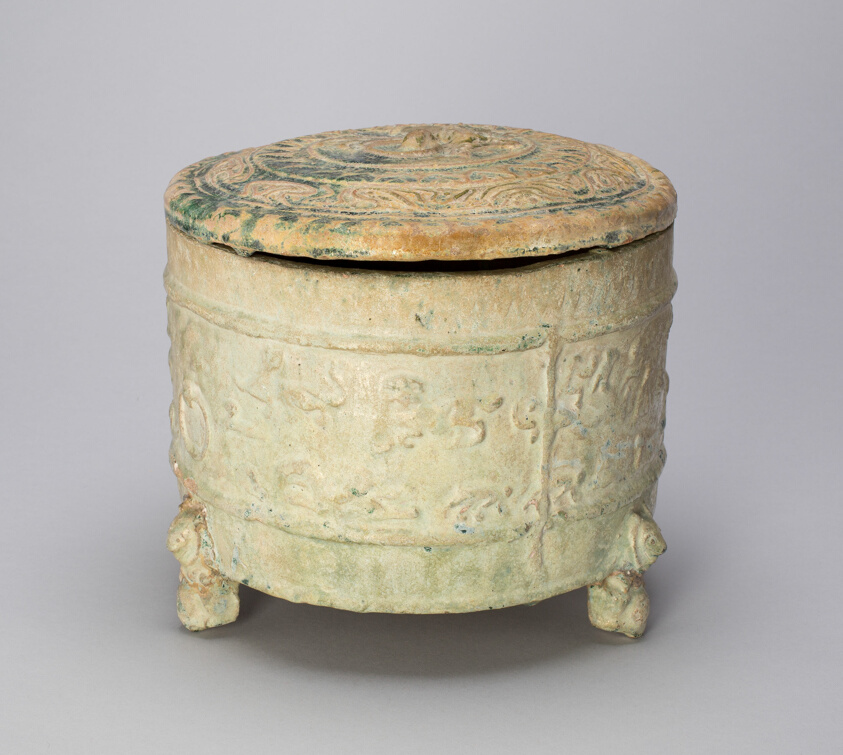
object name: Vessel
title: Tripod Cylindrical Jar (Lian or Zun) with Equestrians and Creatures, Bear-Shaped Feet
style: Chinese (culture or style)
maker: China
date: Eastern Han dynasty (A.D. 25–220)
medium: Earthenware with lead green glaze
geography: China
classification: earthenware; asian art; ceramics; vessel